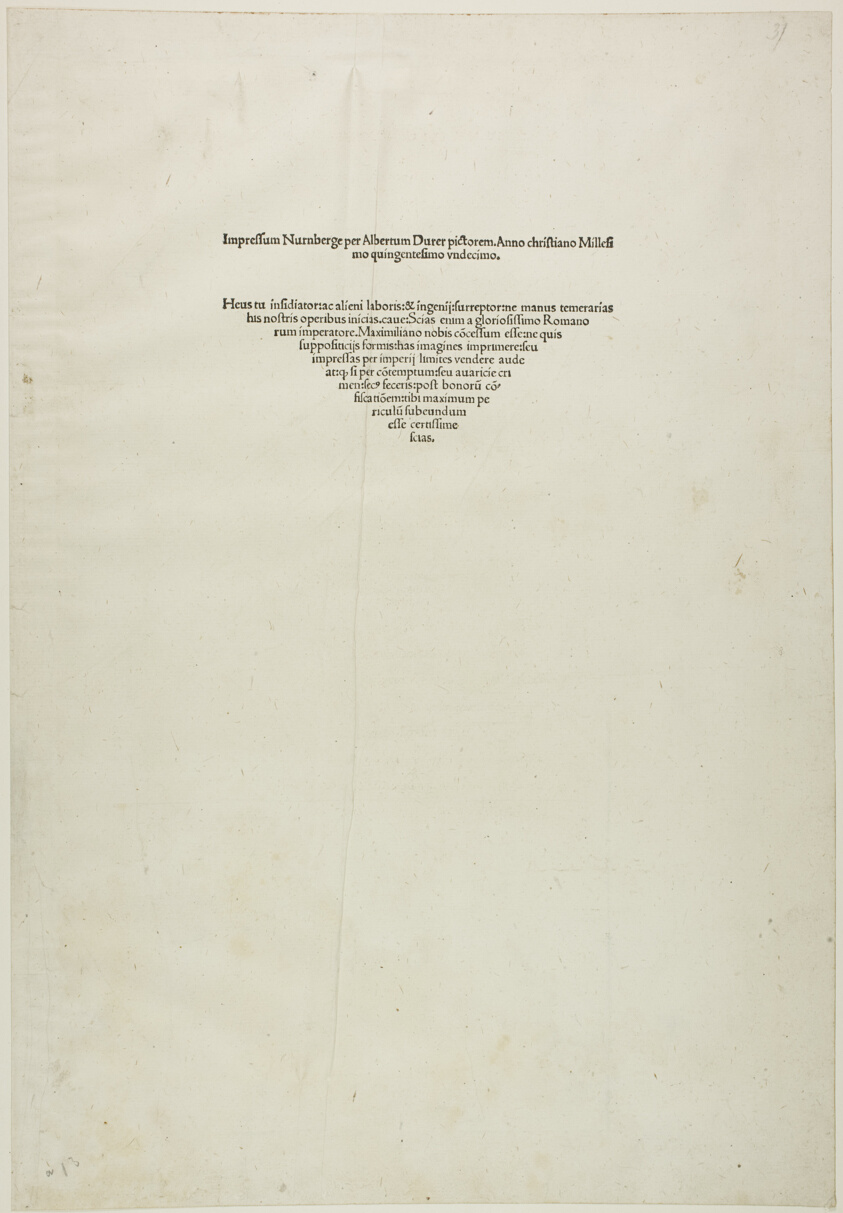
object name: Print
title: Colophon, from the Large Passion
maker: Albrecht Dürer (German, 1471-1528)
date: 1511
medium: Letterpress in black on ivory laid paper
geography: Germany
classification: letterpress; print; prints and drawing; paper